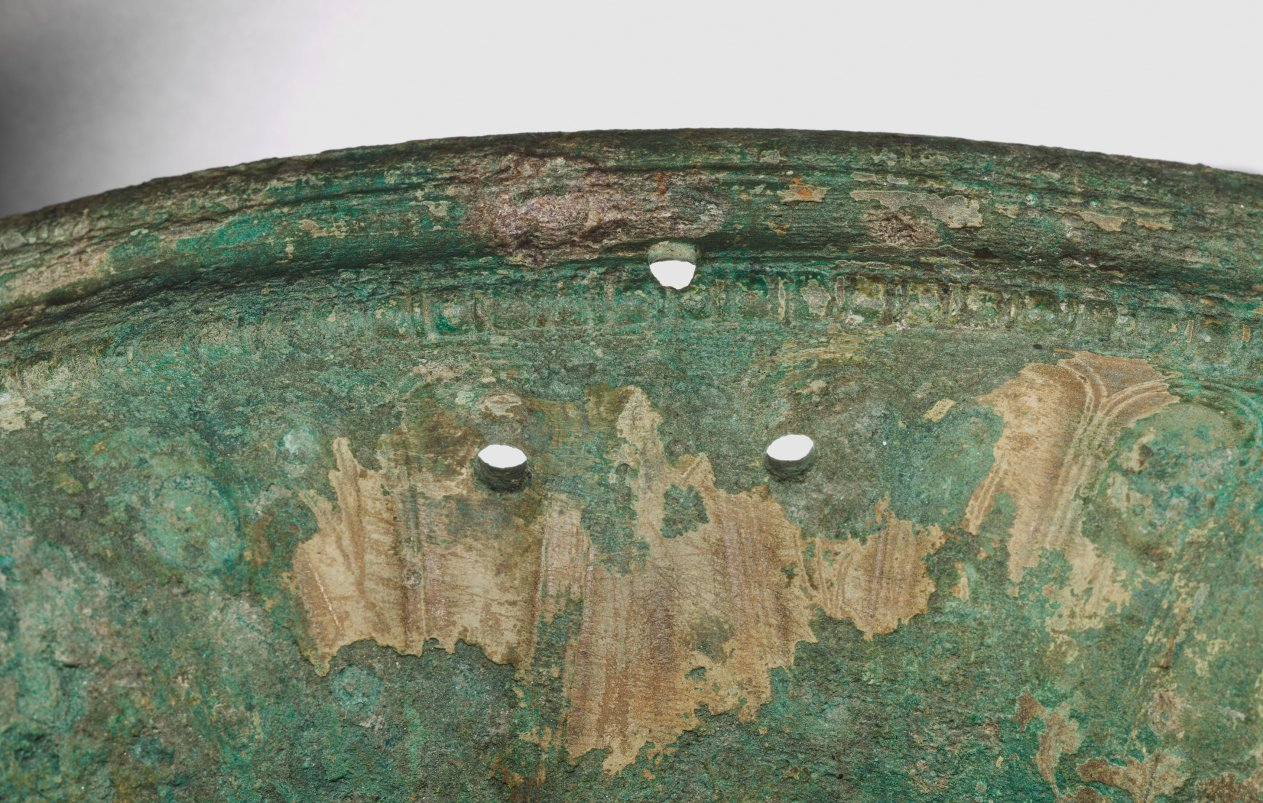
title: Bronze Volute Krater Base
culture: Greece, Laconia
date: late 600s BCE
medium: bronze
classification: Metalwork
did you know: This object supported a large vessel used for mixing wine with water called a krater.